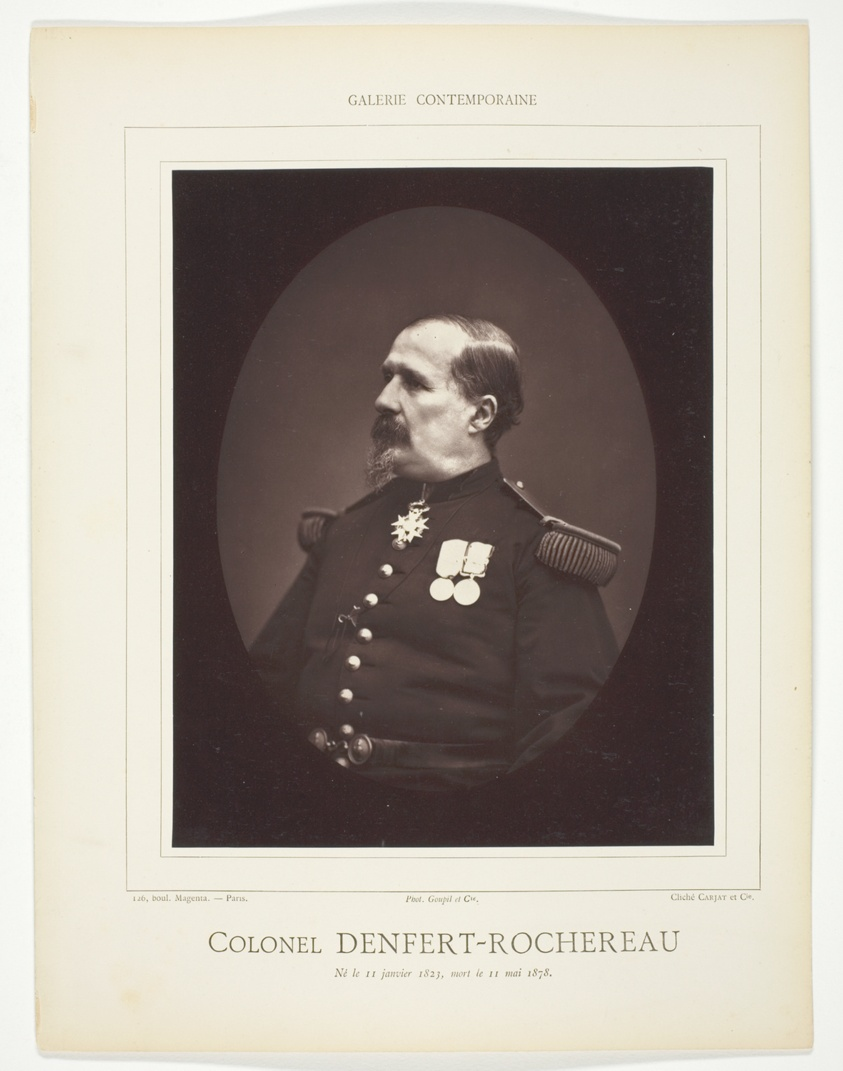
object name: Photograph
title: Colonel Denfert-Rochereau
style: 19th century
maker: Carjat et Cie (Studio); French, 19th century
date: c. 1876/78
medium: Woodburytype, from the periodical “Galerie Contemporaine Littéraire, Artistique” (1878), volume 5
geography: France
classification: woodburytype; photomechanical process; photography; photograph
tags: Collected by Hugh Edwards, Contemporaine Littéraire